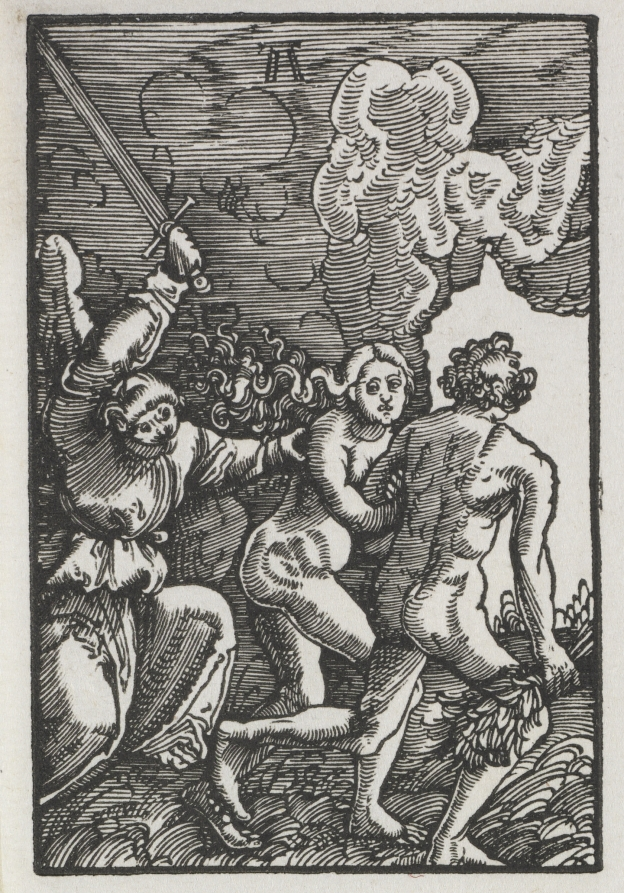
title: The Fall and Redemption of Man: The Expulsion from Eden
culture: Germany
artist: Albrecht Altdorfer (German, c. 1480–1538)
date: c. 1515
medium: woodcut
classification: Print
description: These eight woodcuts come from a series of forty which illustrate the story of Christian redemption from original sin to the Last Judgement. Probably to maximize printing efficiency and quality, eight woodblocks were printed on each of five sheets of paper, but the subjects are not in the correct chronological order. Prior to sale, the sheets were cut into eight pieces. The sheets in the museum's set were only cut in half, preserving four prints per page. The numbers after the titles of the individual images indicate each scene's place within the narrative. By 1513, Altdorfer had already executed a number of small, finely detailed engravings. Because it is difficult to achieve the same degree of precision using woodcut, The Fall and Redemption of Man is a technical tour de force. Probably inspired by Albrecht Dürer's Small Passion (1511)-but almost double the size-the only contemporaneous comparable set of fine miniature woodcuts, Dance of Death, was designed by Hans Holbein in about 1526 (on view nearby).